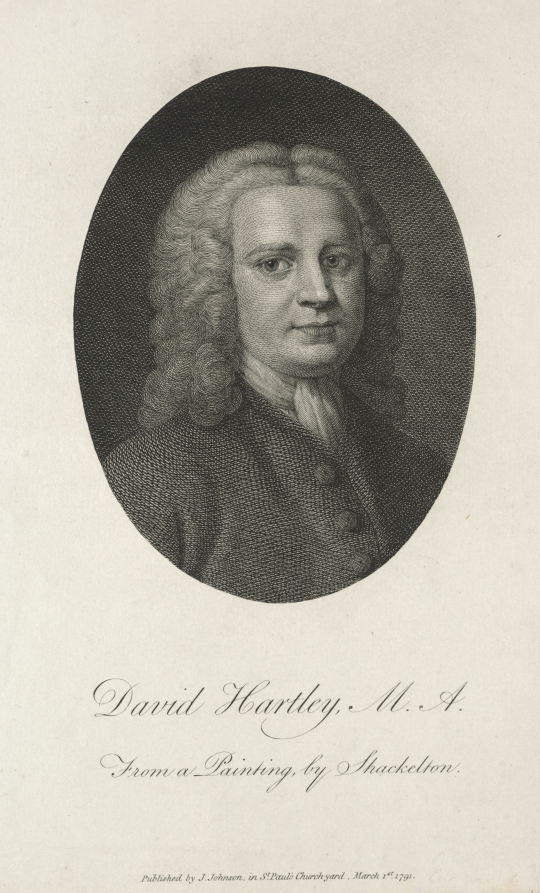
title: David Hartley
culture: England, 18th century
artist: William Blake (British, 1757–1827)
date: 1791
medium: engraving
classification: Print